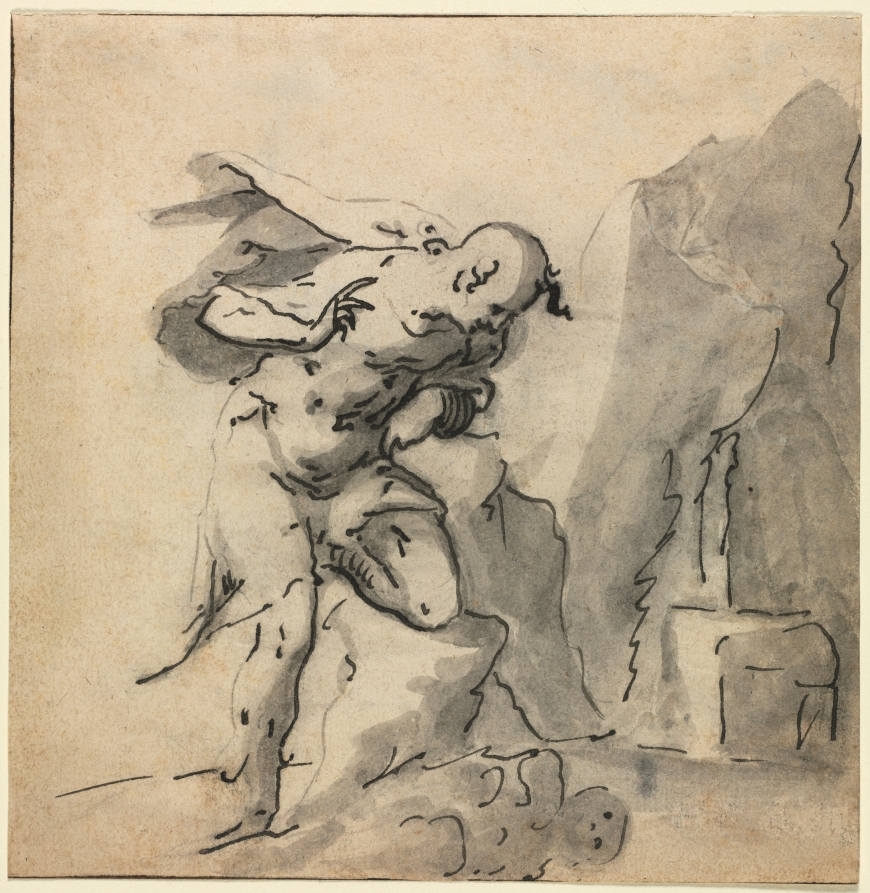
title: Narcissus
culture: Germany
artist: Gabriel Weyer (German, 1576–1632)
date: first half 1600s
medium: brush and black ink and brush and gray wash over traces of black chalk; framing lines in pen and black ink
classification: Drawing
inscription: VERSO, upper left, in black chalk: [F?]erri ; lower left, in graphite: 14 ; upper right, along right edge: 132486